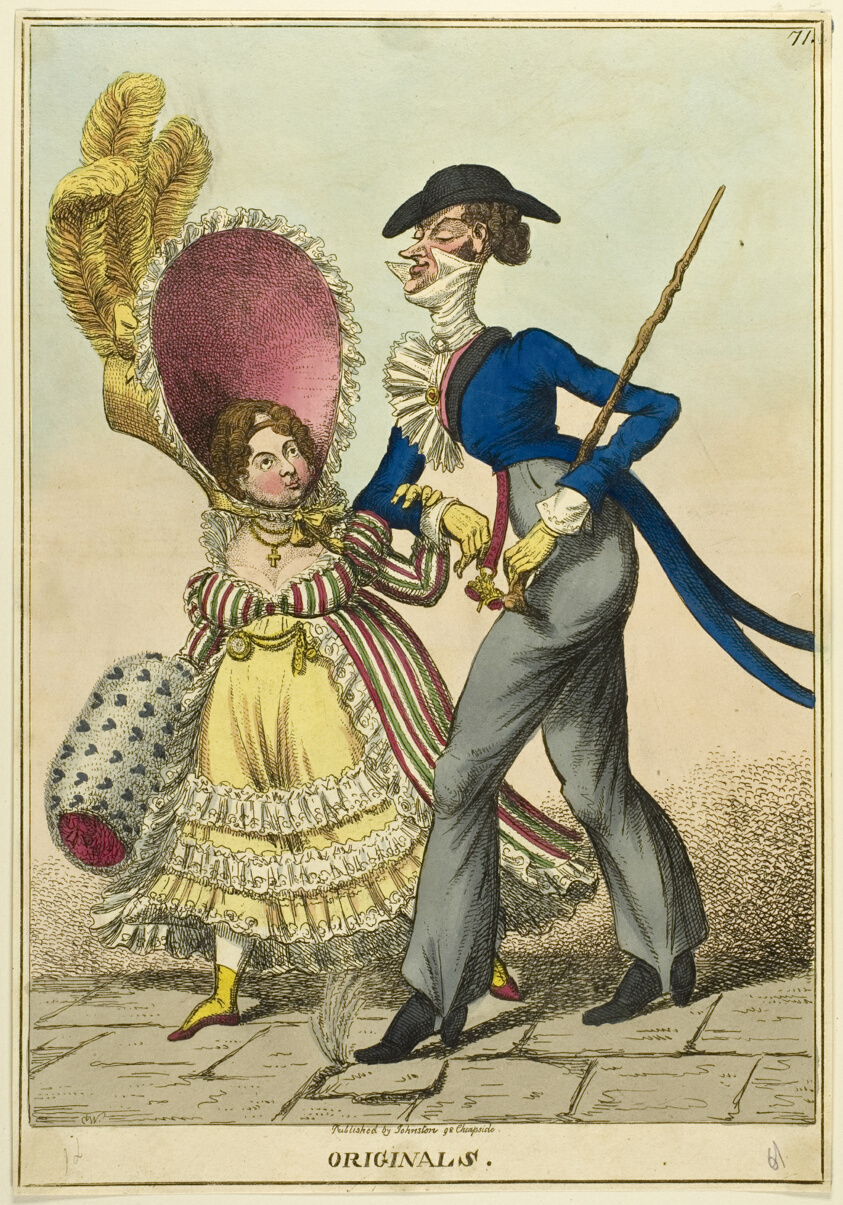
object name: Print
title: Originals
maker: Unknown English artist; published by J. Johnston (English, 19th century)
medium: Hand-colored etching on paper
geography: England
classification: etching; print; prints and drawing